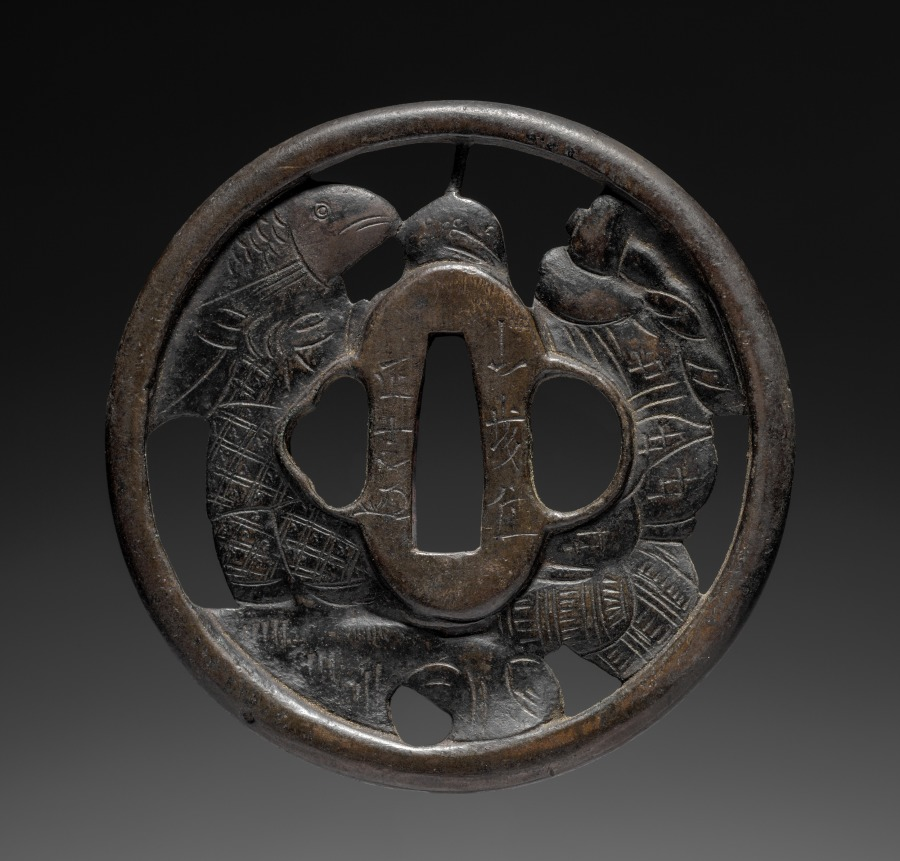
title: Sword Guard (Tsuba) with Daikokuten and Ebisu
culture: Japan, possibly Edo period (1615-1868)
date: c. 1615–1868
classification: Arms and Armor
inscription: signed: 山城住正吉 花押